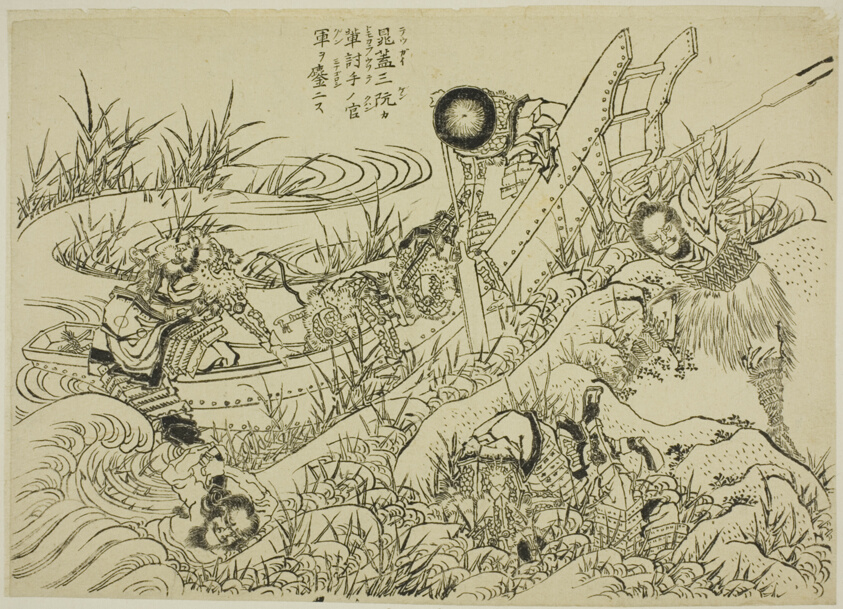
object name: Drawing and Watercolor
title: An Illustrated New Edition of the Water Margin (Shinpen Suikogaden)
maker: Katsushika Hokusai 葛飾 北斎; Japanese, 1760-1849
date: 1823/25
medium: Ink on paper; woodblock-printed books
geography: Japan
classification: woodblock print; print; asian art